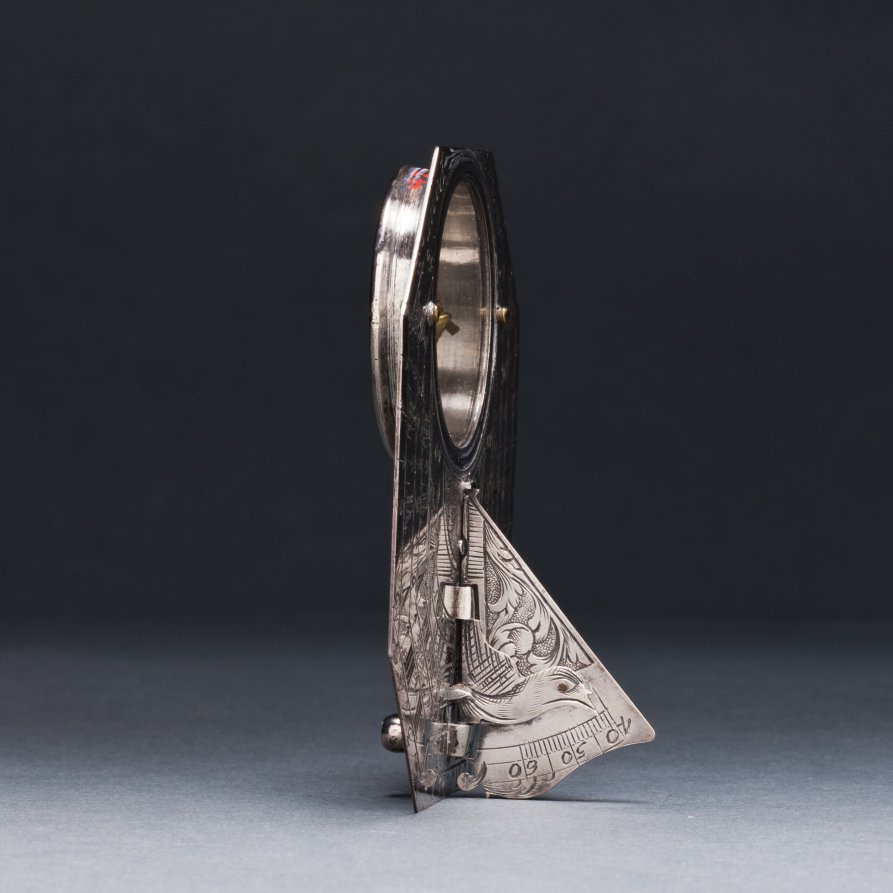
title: Butterfield Sundial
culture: France, 18th century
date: 1700s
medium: silver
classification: Silver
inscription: [Engraved signature above the compass in ribbon band]: "N. BION A Paris"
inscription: [Engraved on the face of the sundial]: “Pour 55° 4-5-6-7-8-9-10-11 50° IIII-V-VI-VII-VIII-IX-X-XI 45° 5-6-7-8-9-10-11 40° -VI-VII-VIII-IX-X-XI'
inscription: [Engraved on the other side]: "Pour 55° -8-7-6-5-4-3-2-1-0 50°-VIII-VII-VI-V-IIII-III-II-I 45°-8-7-6-5-4-3-2-1 40°-VII-VI-V-IIII-III-II-I"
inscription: [Engraved around the compass]: “NORD-OUEST-SUD-EST”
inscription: [Engraved on the back of the sundial]: “Turin 44 Milan 46 Paris 49 Lion 46 Metz 49 Rome 42 Liege 51 Naples 44 Namur 50 Gennes 44 Marseille 43 Grenoble 45 Bayonne 43 Bruxelle 51 Londres 52 Nantes 47 Vienne 48 Toulon 43 Tours 47 Lille 51”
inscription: [Engraved around the back of the compass]: “Venise 45 Strasbourg 49 Amsterdam 52 Hambourg 54 Varsovie 52 La Rochelle 46”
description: Butterfield-type sundials are characterized by their adjustable gnomons, metal flaps that cast a shadow on the dial’s face to indicate the hour, and geographical indices. This sundial has a scale adjustable between latitudes of 40° to 60° north. The latitudes of 26 European towns are engraved on its back for quick reference. With an intricately engraved silver face, it would have functioned as a fashionable traveler’s accessory.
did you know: Butterfield-style sundials were named after Micheal Butterfield, an English scientific and mathematical instrument maker who worked in Paris between 1674 and 1724.